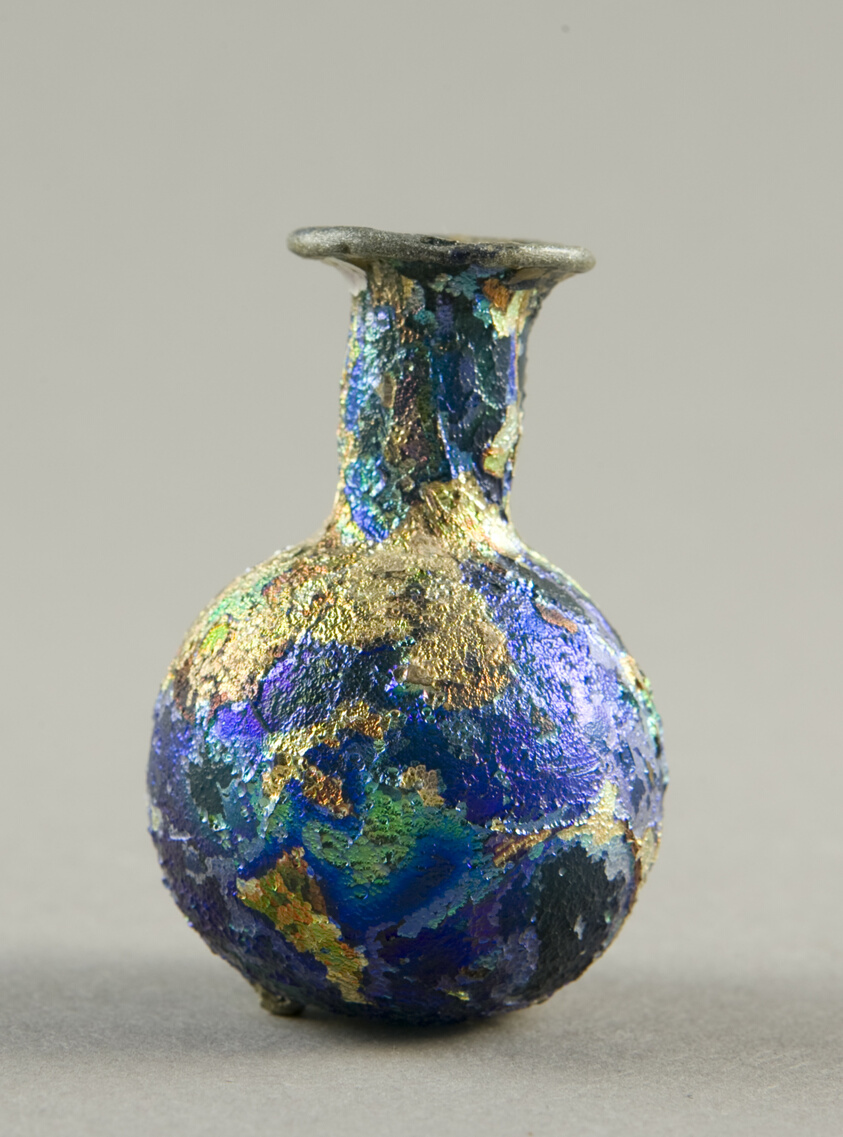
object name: Vessel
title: Bottle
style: syrian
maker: Roman or Byzantine, Syria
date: 2nd-6th century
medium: Glass, blown technique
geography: Syria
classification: bottle; glass; vessel; ancient art